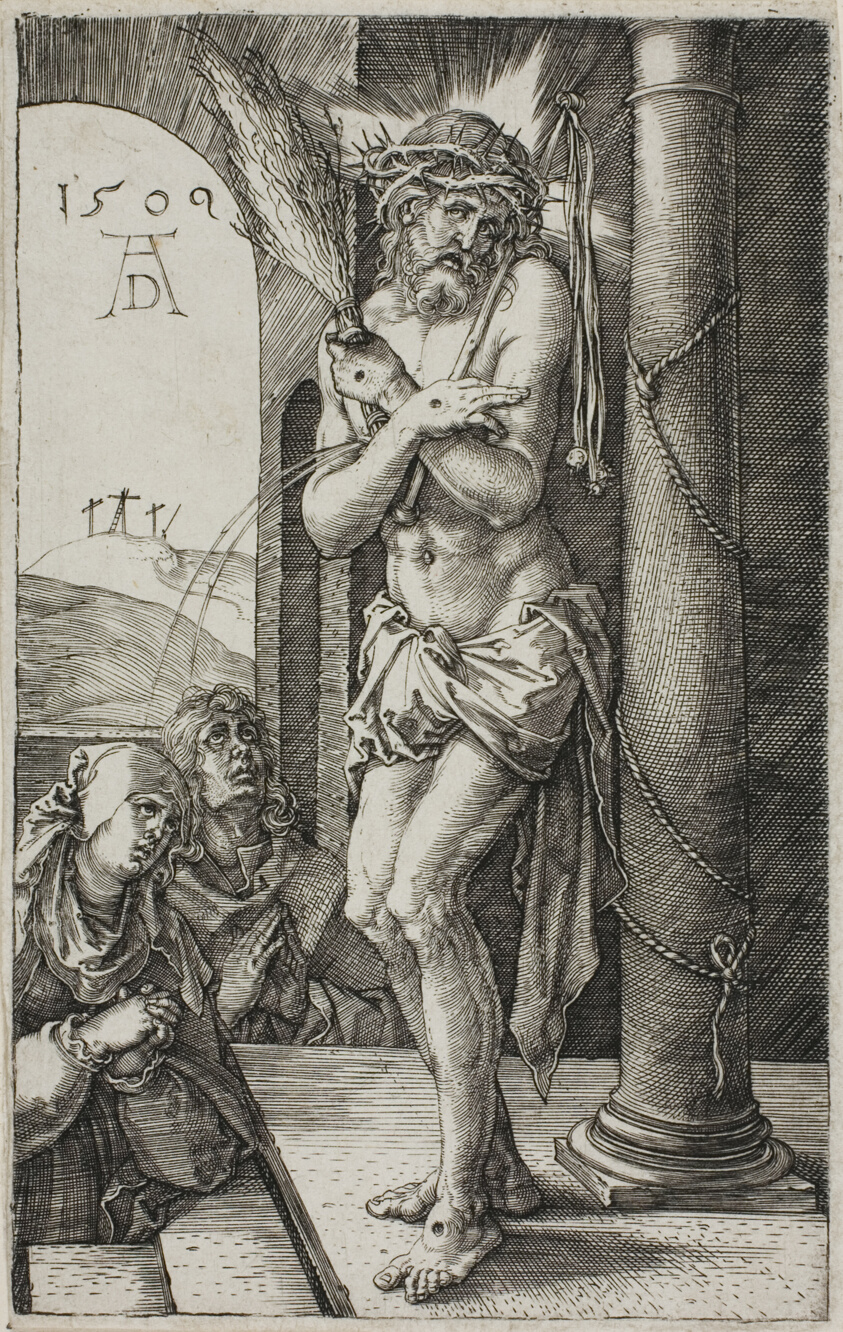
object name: Print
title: Man of Sorrows by the Column, frontispiece from The Engraved Passion,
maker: Albrecht Dürer (German, 1471-1528)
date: 1509, published 1513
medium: Engraving in black on ivory laid paper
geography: Germany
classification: engraving; print; prints and drawing; paper